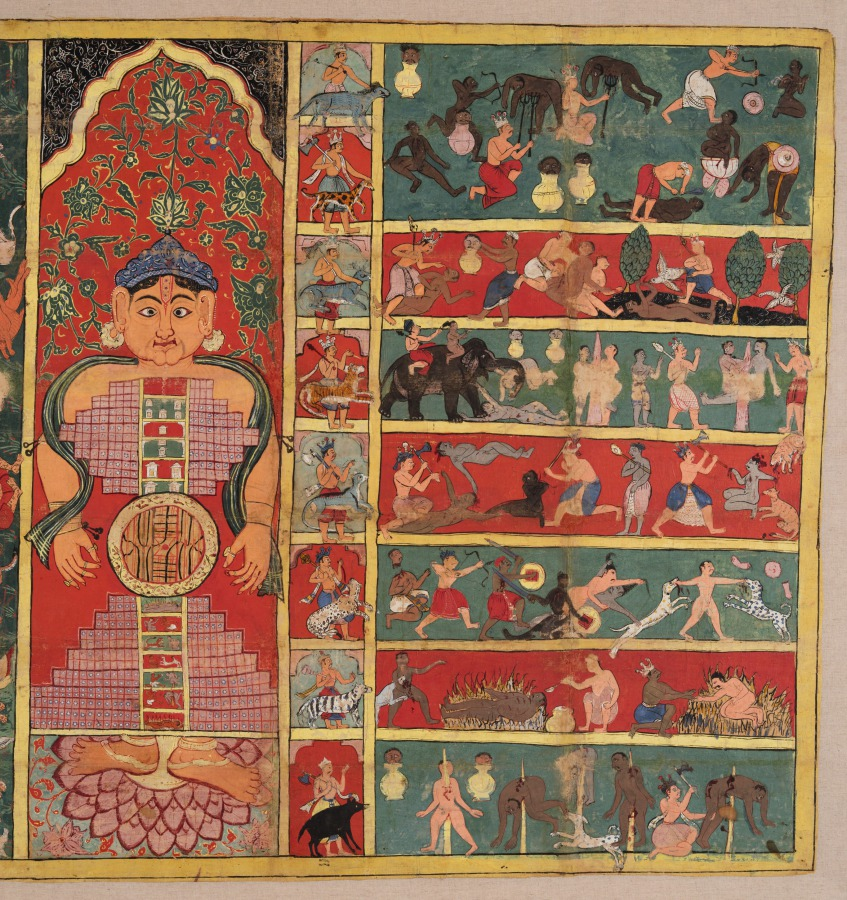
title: Diagrams of the Universe: The Two-and-a-Half Continents, the Universe in the Shape of a Person, and the Seven Levels of Hell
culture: Western India, Gujarat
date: 1613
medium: Gum tempera, ink, and gold on cloth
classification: Painting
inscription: saṃvat 1670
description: According to Jain cosmology, the universe is envisioned in the shape of a man. Above the waist are seven levels of heavens; below the waist are seven levels of hell. His midsection is the earthly realm, here shown as a round diagram with mountains and rivers, expanded at the left. The hell scenes are elaborated at the right.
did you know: The seven levels of hell depict various punishments as per Jain mythology.